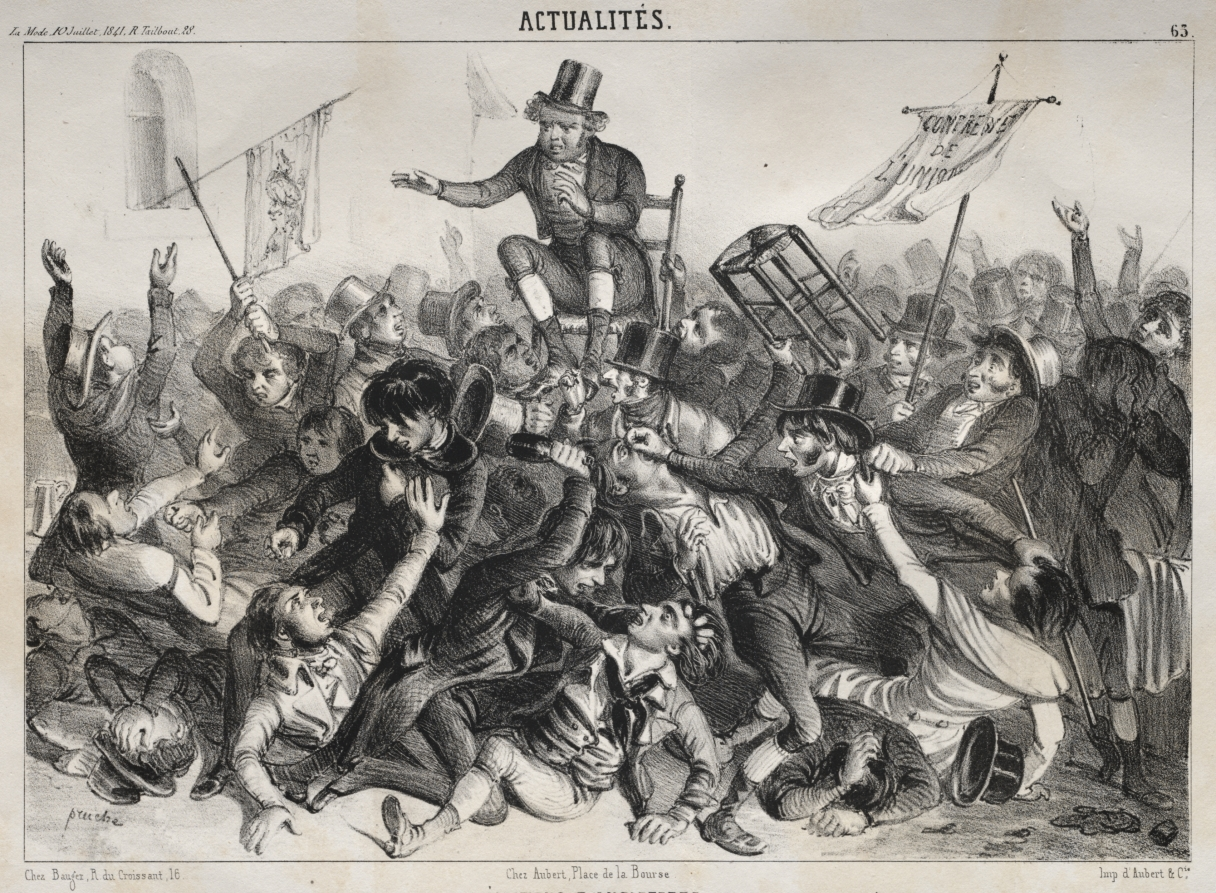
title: Actualités: Élections d'Angleterre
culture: France, 19th century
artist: Clémente Pruche (French, 1831–1870)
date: 1841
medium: lithograph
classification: Print